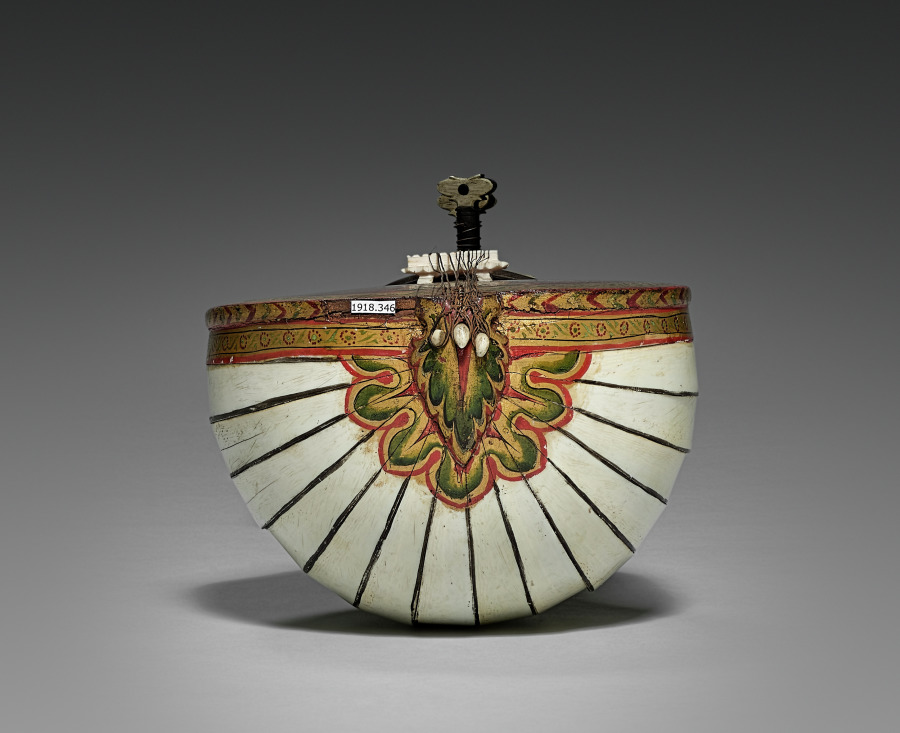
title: Sitar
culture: Eastern India, Bengal or Bangladesh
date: c. 1850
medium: Gourd and wood with pigment, ivory, and bone; copper alloy: frets; iron alloy: strings (with one modern copper replacement)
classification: Musical Instrument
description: The stringed instrument known as the sitar usually provided the central sound for the musical performances that were a constant feature of court life in India. The sitar could then be accompanied by percussion, voice, and other supporting instruments. In Raja Deen Dayal’s photograph Maharaja of Rewa in Prayer (2016.266.21), a musician strums a sitar in order to please the deities on the royal altar. The improvised compositions are played in a mode, or key, that correlates to the time of day and season of the year.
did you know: Many paintings of Indian court life depict female musicians holding and playing this kind of lightweight stringed instrument.